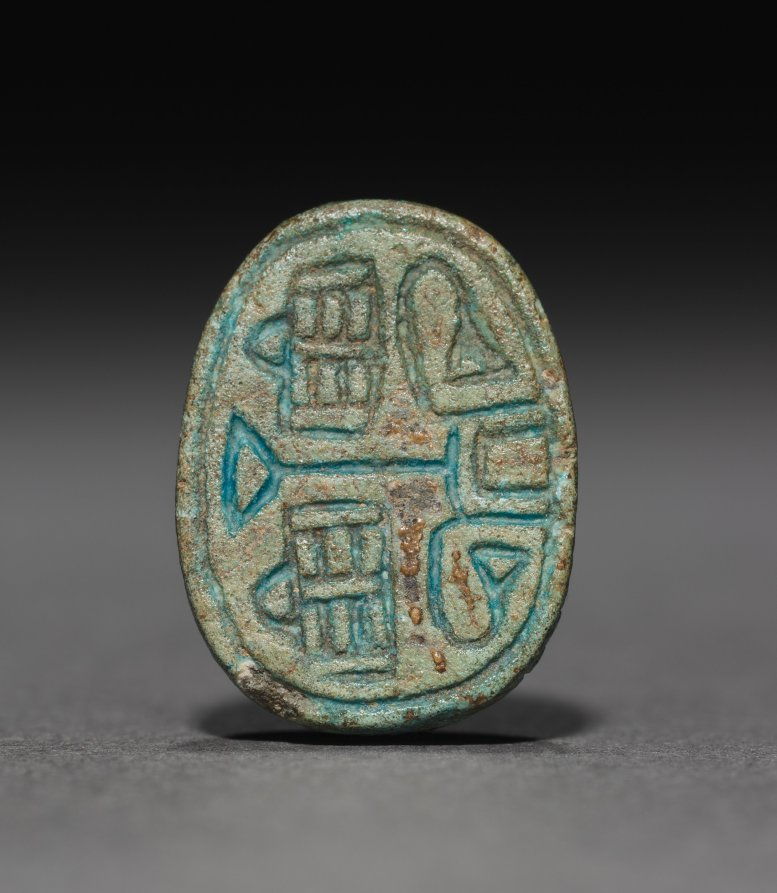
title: Scarab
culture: Egypt, Middle Kingdom (2040–1648 BCE), Dynasty 13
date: 1901–1648 BCE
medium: turquoise-glazed steatite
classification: Scarabs